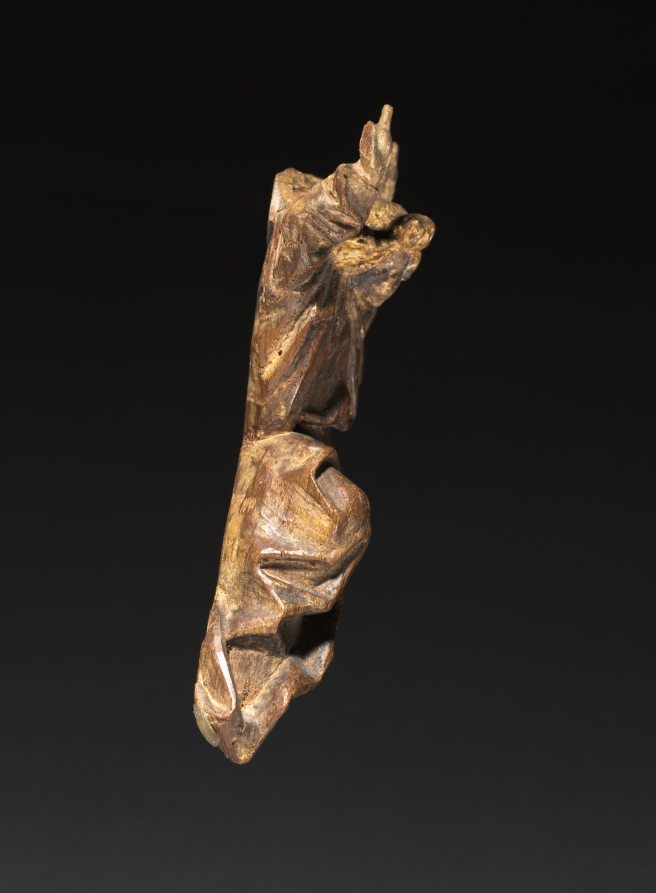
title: Angel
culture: South Netherlands, Brabant, 16th century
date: c. 1500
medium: oak with traces of gilding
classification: Sculpture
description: This lamenting angel probably comes from a Crucifixion scene at the center of a multi-figured altarpiece.